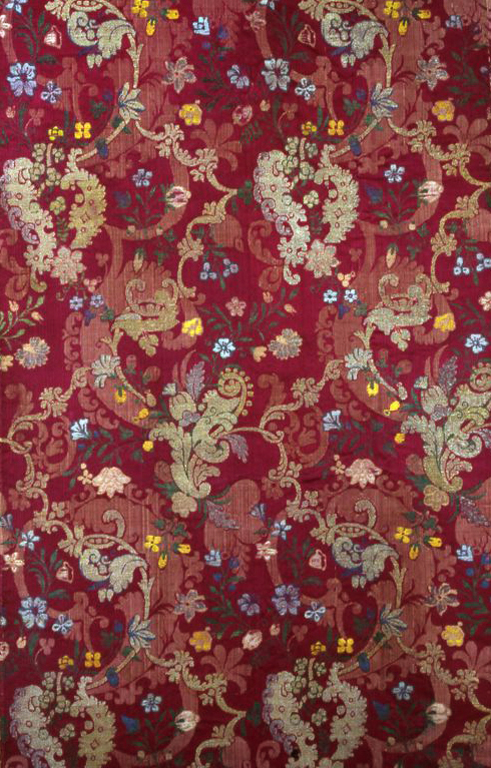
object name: Textile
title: Panel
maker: France or Italy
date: 1700/25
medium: Silk and gilt- and silvered-metal-strip-wrapped silk, 4:1 satin damask weave with supplementary brocading wefts bound in weft-float faced 4:1 twill interlacings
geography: France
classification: textile; weaving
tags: flowers, foliage